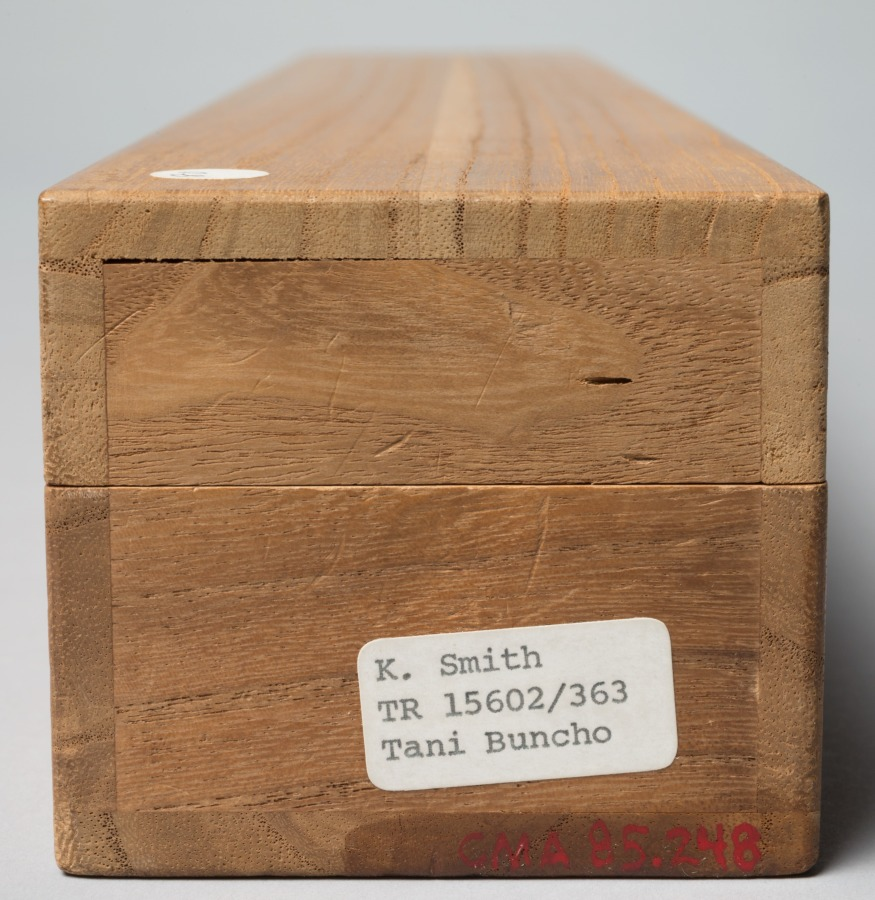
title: Imaginary Portrait of Shundai Dazai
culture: Japan, Edo period (1615–1868)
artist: Tani Bunchō (Japanese, 1763–1841)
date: late 1700s–1800s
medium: hanging scroll; ink and color on paper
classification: Painting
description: Shundai (1680–1747) was a noted Confucian scholar and writer. Brought up with a strongly Confucian family background, Bunchō’s veneration for Shundai is understandable. The inscription is by Nozawa Hikoroku, a scholar and poet contemporary with Bunchō.